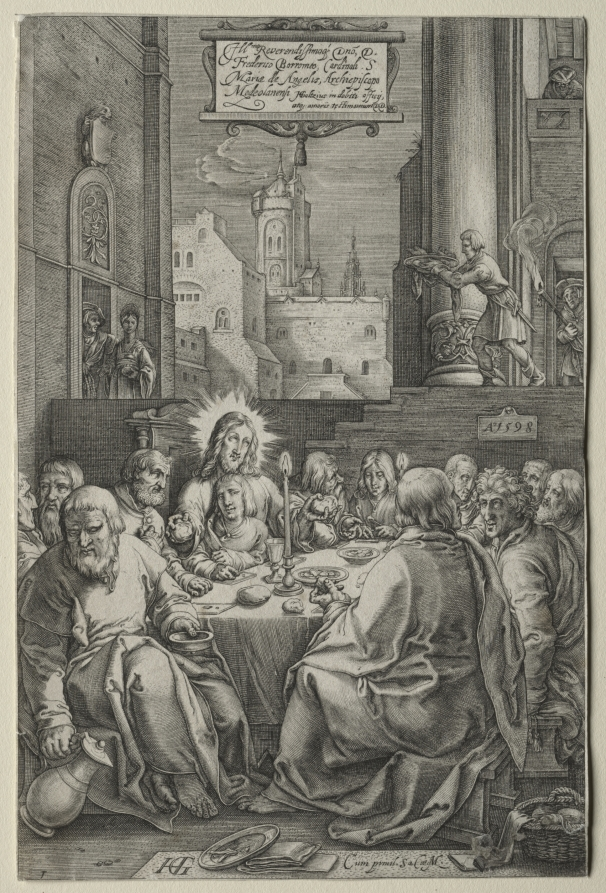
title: The Passion: The Last Supper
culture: Netherlands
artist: Hendrick Goltzius (Dutch, 1558–1617)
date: 1598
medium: engraving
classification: Print